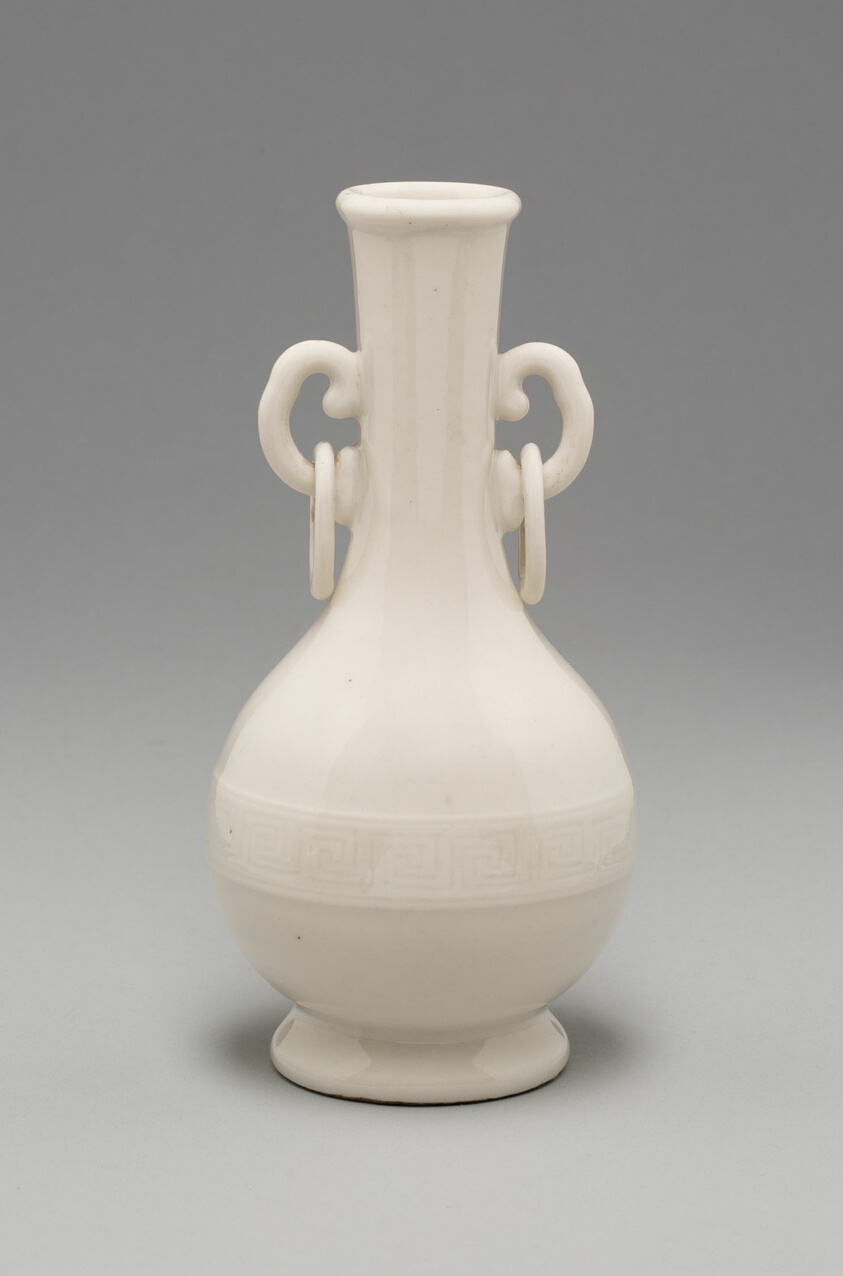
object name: Vessel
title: Vase with Loop Handles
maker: China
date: Ming dynasty (1368–1644)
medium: Porcelain with underglaze molded decoration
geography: China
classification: porcelain; asian art; ceramics